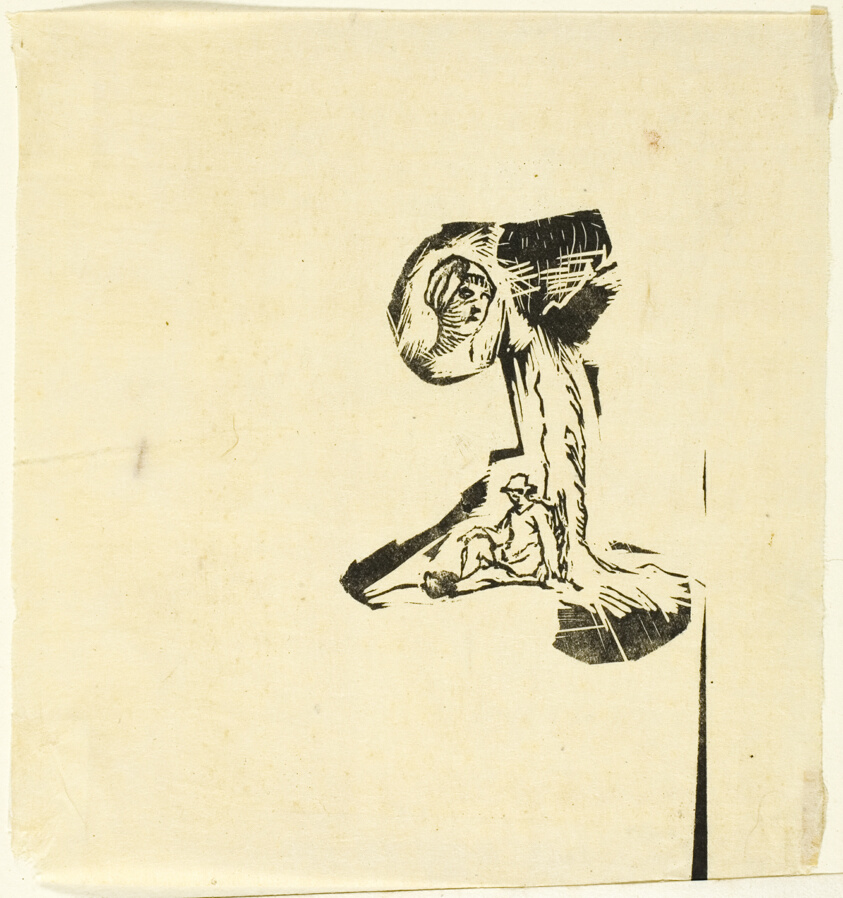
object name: Print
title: Sketches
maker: Jean François Millet (French, 1814-1875)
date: after 1863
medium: Woodcut from a partially inked block on cream laid Japanese tissue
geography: France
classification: woodcut; print; prints and drawing